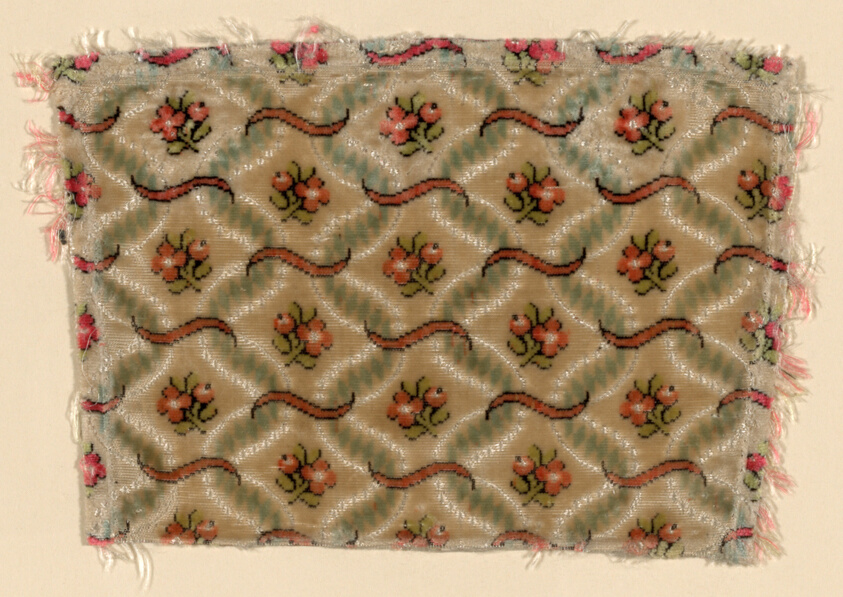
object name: Textile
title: Fragment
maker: France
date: 1725/50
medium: Silk, cut, and voided velvet with additional patterning wefts tied in twill weave against plain weave foundation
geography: France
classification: textile; weaving - velvet